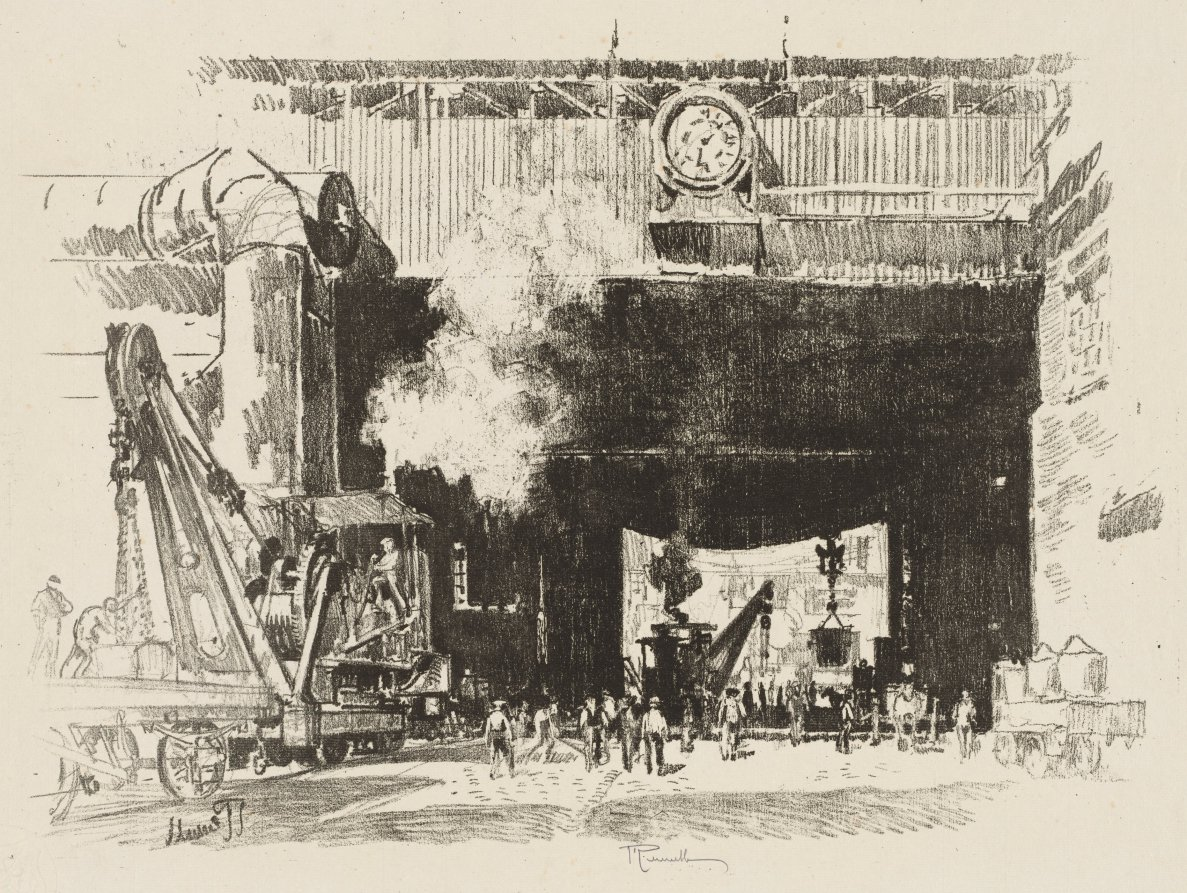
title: English War Work: The Big Gate of the Big Shop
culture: America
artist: Joseph Pennell (American, 1857–1926)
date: 1916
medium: lithograph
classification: Print